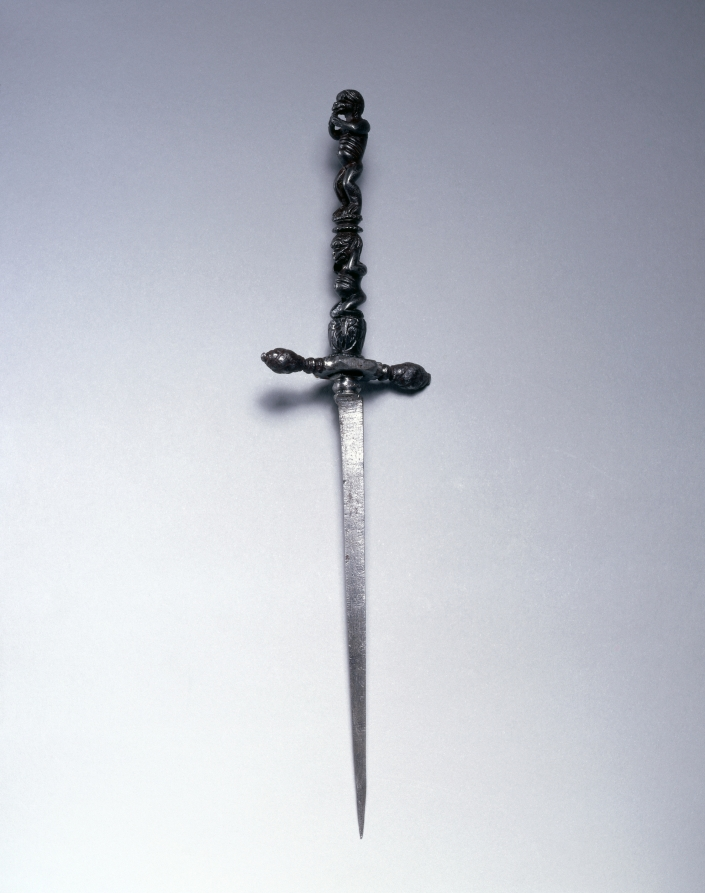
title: Stiletto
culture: Italy, Brescia, 17th century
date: c. 1650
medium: steel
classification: Arms and Armor